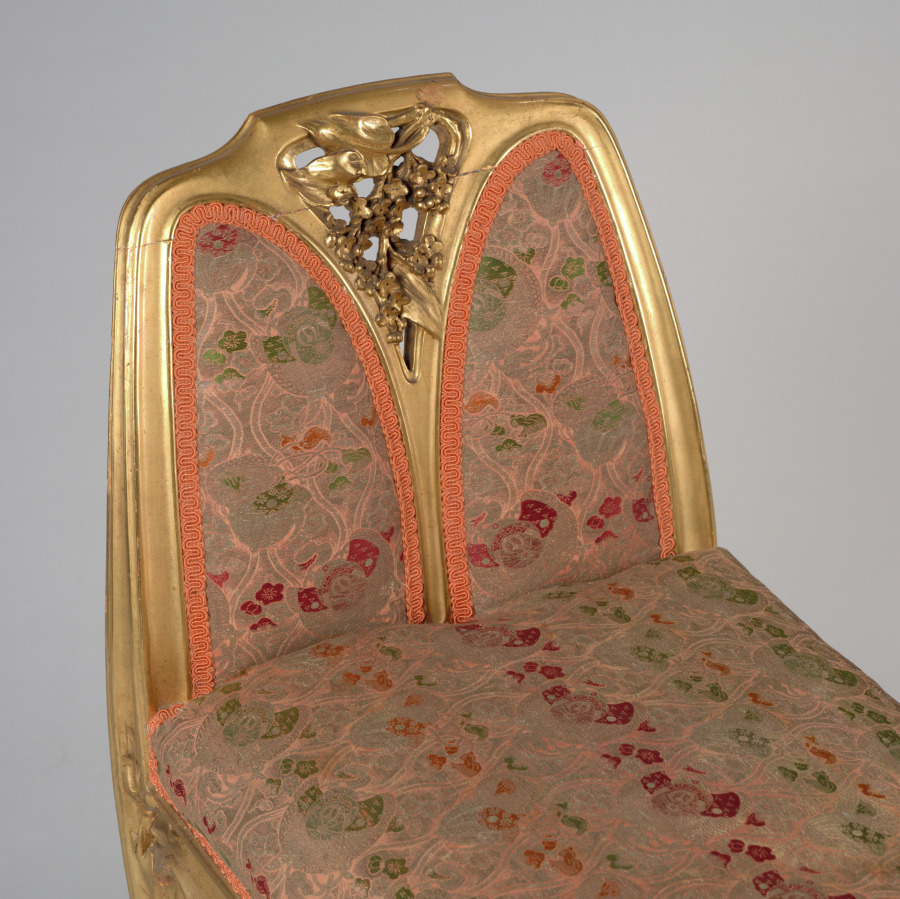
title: Bench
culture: France, Nancy, late 19th-early 20th Century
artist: attributed to Louis Majorelle (French, 1859–1926)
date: c. 1900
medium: gilt wood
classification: Furniture and woodwork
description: In the 20th century, designers of French furniture in the Art Nouveau style began to take inspiration from Rococo pieces of around 1750. With its gently curving forms, this bench exhibits the Majorelle firm's version of this refined taste. It is presently covered with a Japanese brocade of about 1900.